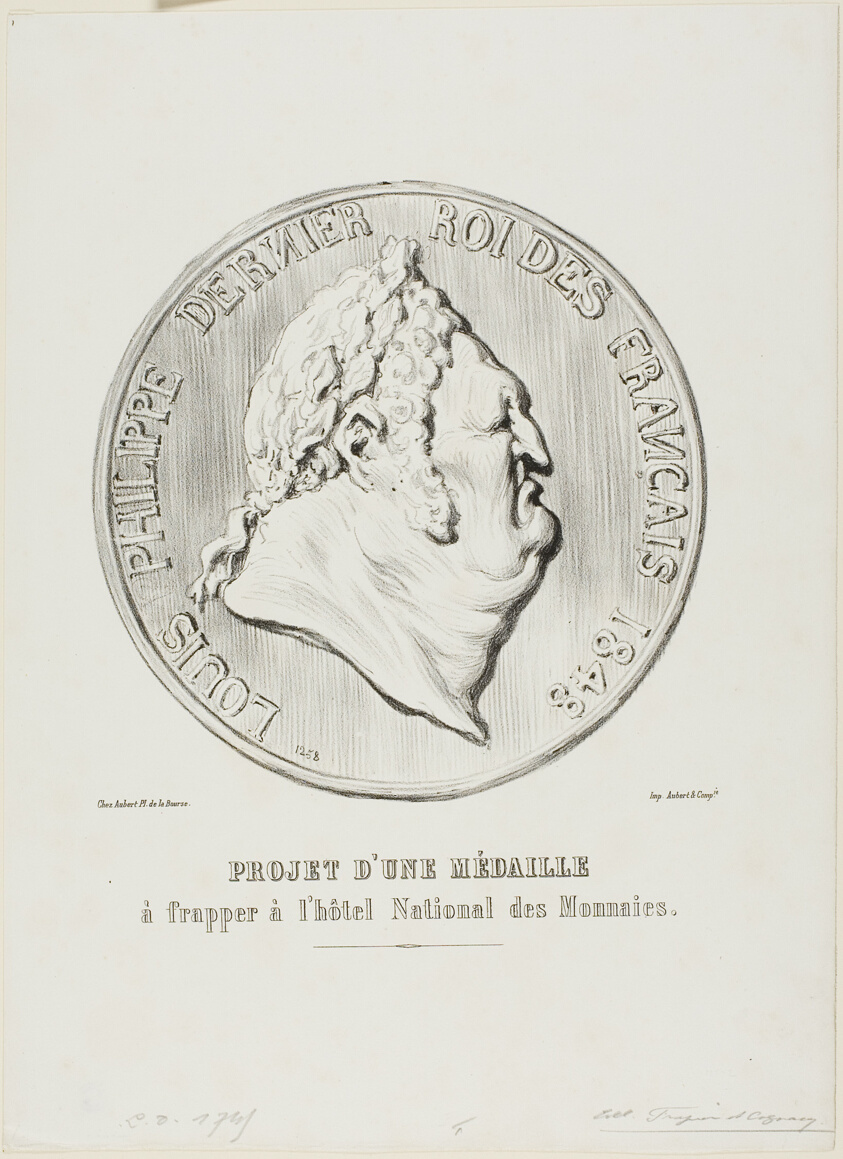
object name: Print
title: Louis-Philippe, Last King if the French 1848. Design for a medal to be manufactured by the National Mint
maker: Honoré Victorin Daumier; French, 1808-1879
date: 1848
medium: Lithograph in black on white wove paper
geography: France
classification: lithograph; print; prints and drawing